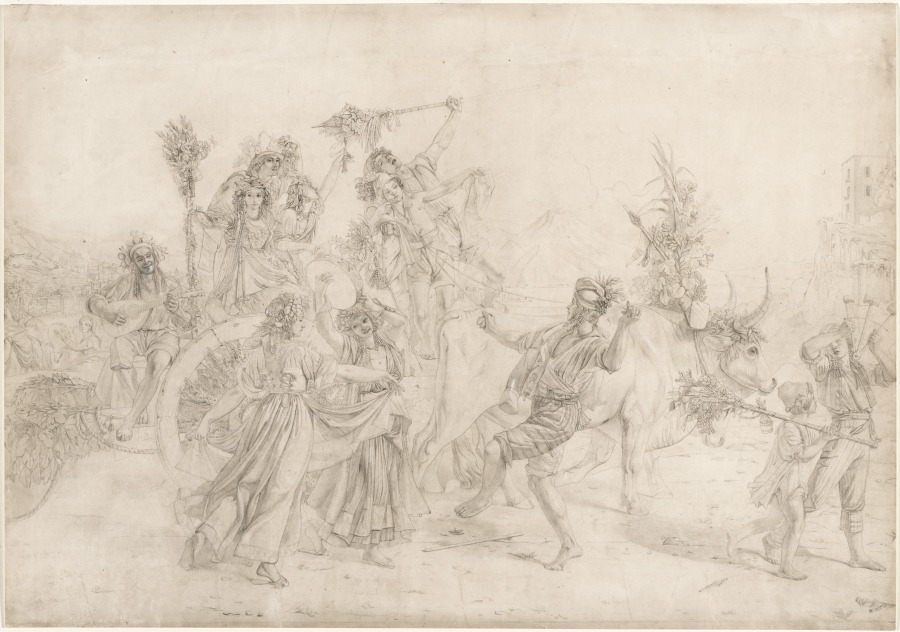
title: Pilgrims Returning from the Feast Day of the Madonna dell'Arco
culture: France, 19th century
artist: Léopold Robert (Swiss, 1794–1835)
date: 1827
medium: pencil with white ink corrections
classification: Drawing